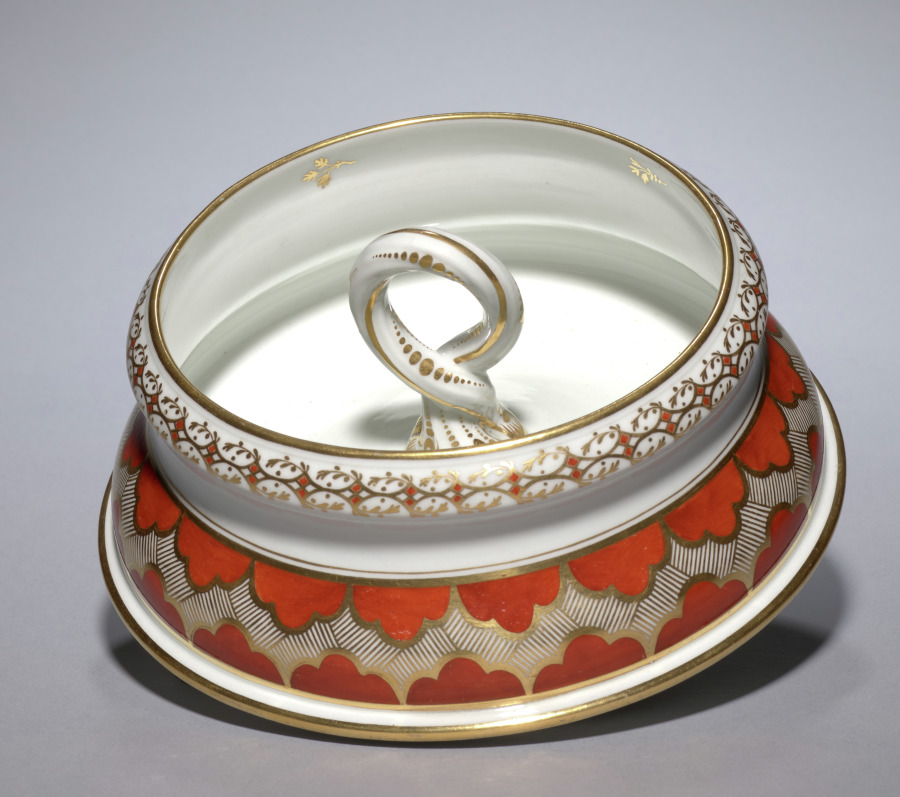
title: Cover for an Ice Pail (1 of 2)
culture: England, late 18th-early 19th Century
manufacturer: Flight & Barr (British)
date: c. 1792–1804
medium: porcelain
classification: Ceramic